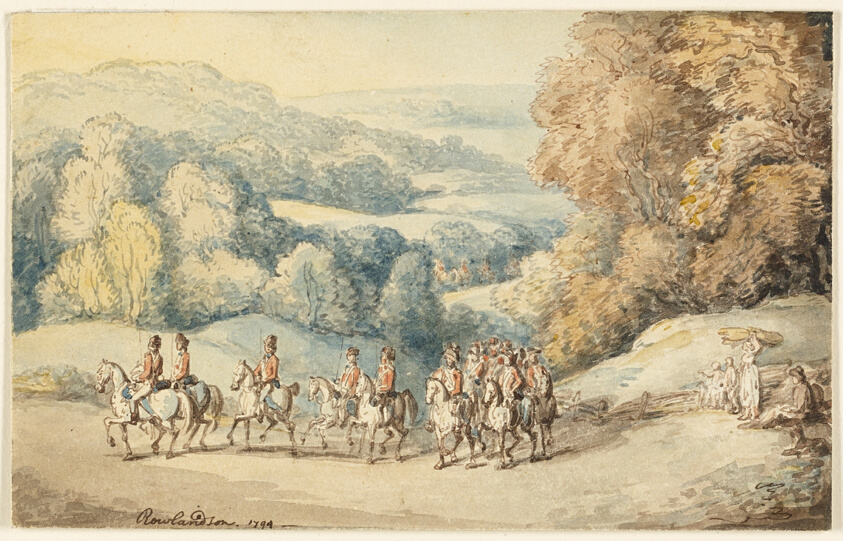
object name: Drawing and Watercolor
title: Cavalry on the March (recto); Fragment of Sketch of Horse (verso)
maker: Thomas Rowlandson (English, 1756-1827)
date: 1794 (recto); n.d. (verso)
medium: Pen and brown ink, with brush and watercolor, on ivory wove paper, laid down on card (recto), and black chalk on ivory wove card (verso)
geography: England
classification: watercolor; drawings (visual works); prints and drawing